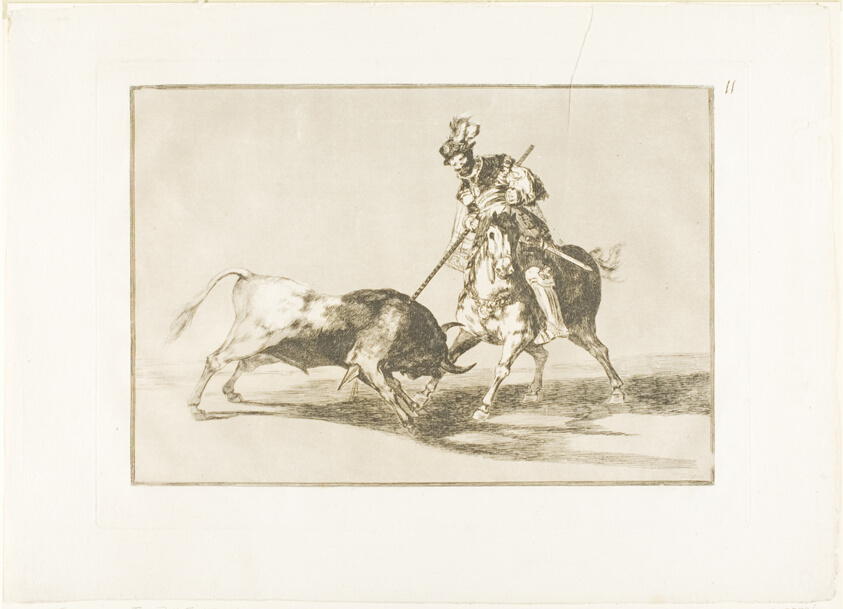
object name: Print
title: The Cid Campeador spearing another bull, plate eleven from The Art of Bullfighting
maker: Francisco José de Goya y Lucientes (Spanish, 1746-1828)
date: 1814/16, published 1816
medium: Etching, burnished aquatint and burin on ivory laid paper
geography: Spain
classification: etching; print; prints and drawing